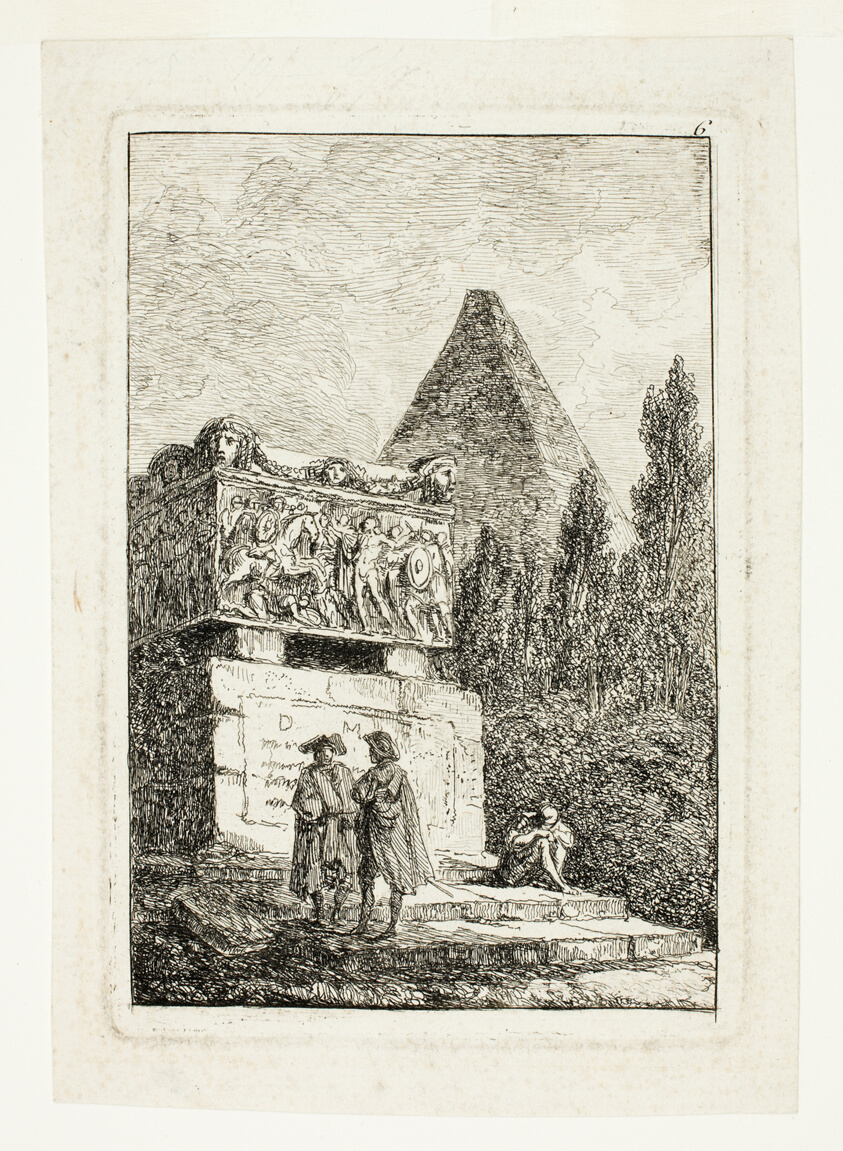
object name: Print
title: Landscape with Pyramid and Sarcophagus, plate six from Les Soirées de Rome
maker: Hubert Robert (French, 1733-1808)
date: 1763/64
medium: Etching on ivory laid paper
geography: France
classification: etching; print; prints and drawing